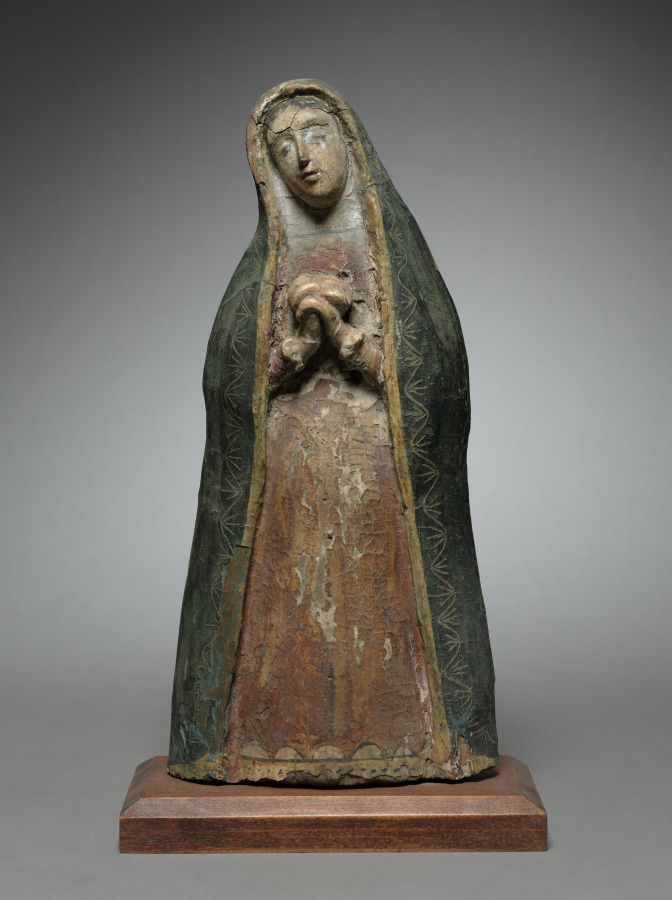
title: Our Lady of Sorrows: santo de bulto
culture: America, New Mexico, 17th-18th century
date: 1600s-1700s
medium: painted wood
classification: Sculpture